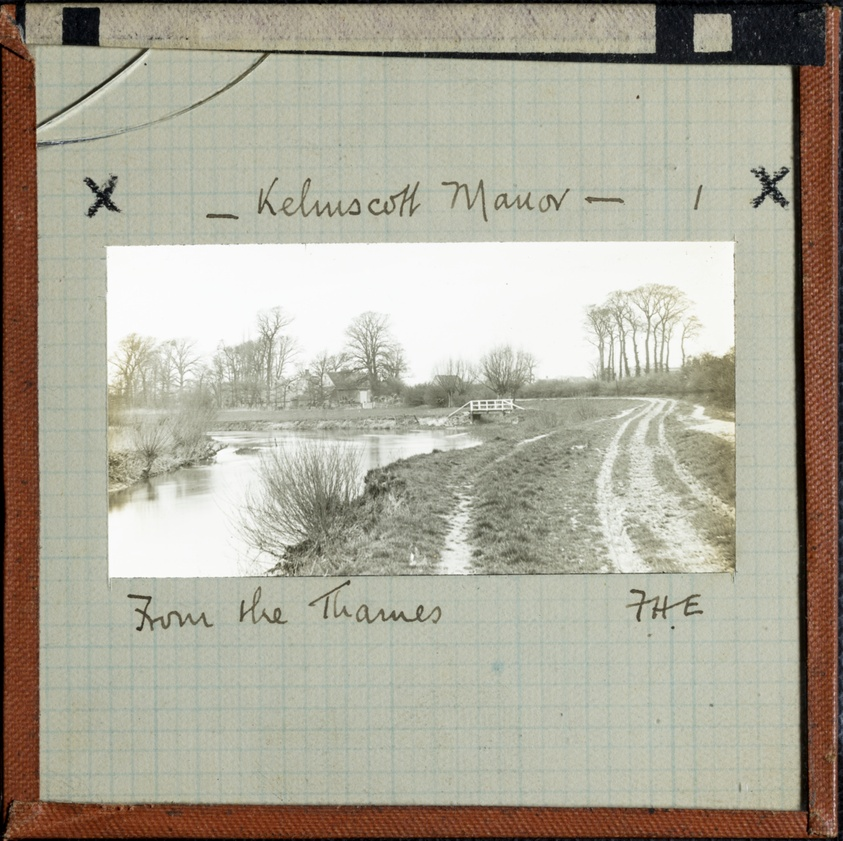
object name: Photograph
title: Kelmscott Manor: From the Thames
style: Pictorialism, 19th century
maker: Frederick H. Evans (English, 1853–1943)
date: 1896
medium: Lantern slide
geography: England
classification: photograph; photography